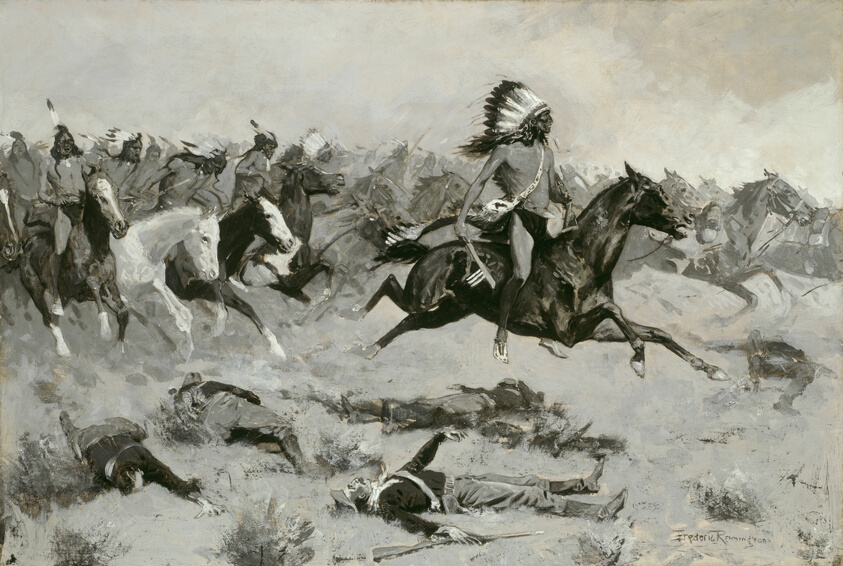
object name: Painting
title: Rushing Red Lodges Passed through the Line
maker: Frederic Remington (American, 1861–1909)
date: c. 1900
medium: Oil on canvas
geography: New York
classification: painting; american arts